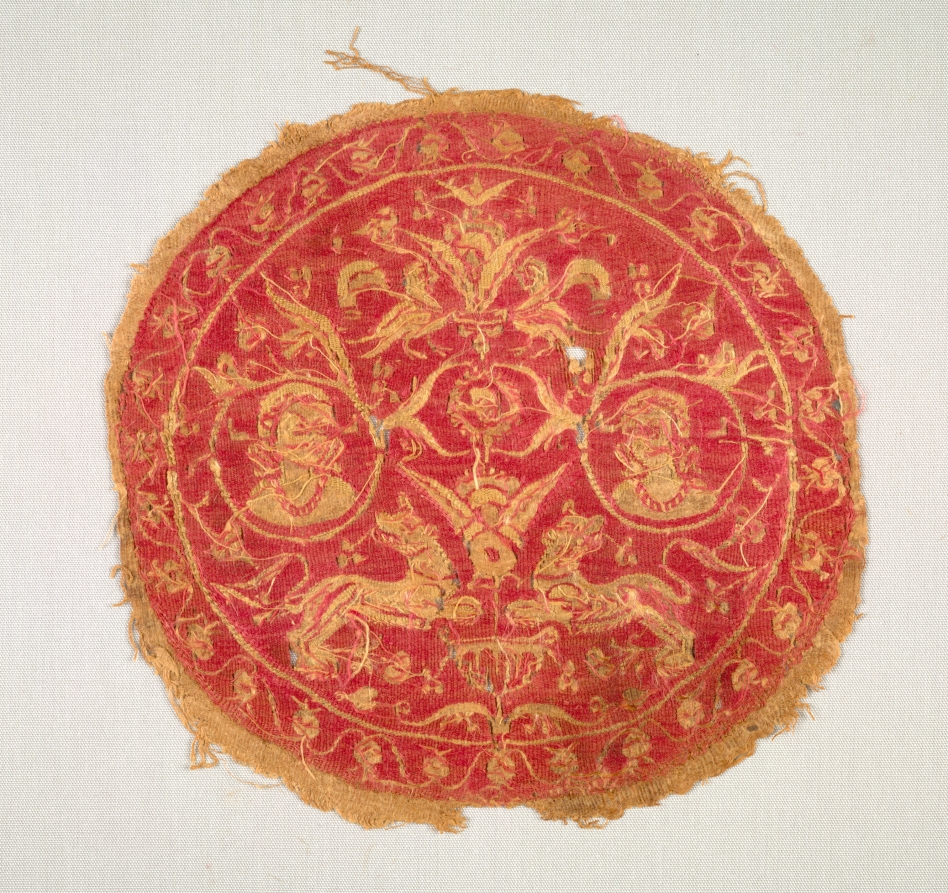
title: Busts and Animals Under Tree of Life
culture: Egypt, Islamic period, Abbasid, 8th - 9th century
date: late 700s - 800s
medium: Plain weave and slit-tapestry weave; undyed linen, dyed wool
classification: Textile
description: This elegant symmetrical roundel, probably from a tunic, features a central tree of life with leaves enclosing the bust of a woman on each side. Animals above the bowl and birds toward the top flank the tree which is framed by a sinuous vine.